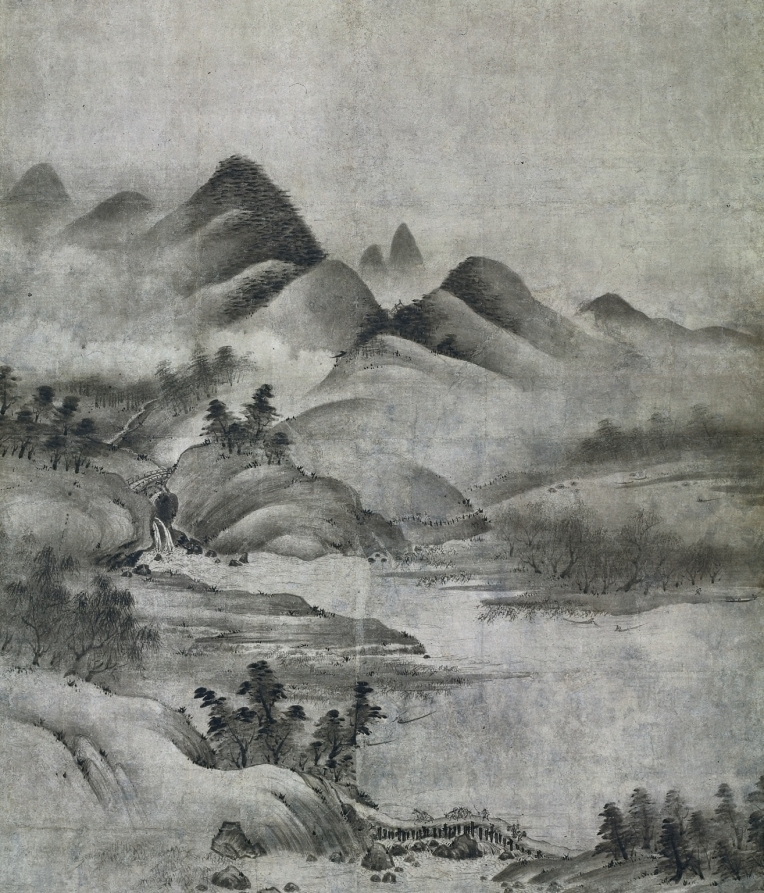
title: Landscape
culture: Japan, Muromachi period (1392–1573)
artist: Sōami (Japanese, d. 1525)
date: early 1500s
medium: hanging scroll; ink on paper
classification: Painting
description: Kyoto-based painter Sōami adapted the small-format Chinese album leaf and handscroll painting compositions belonging to the Ashikaga shogunate to the large-scale paintings he created for residences and Buddhist temples. As curator of the shogunal collection, Sōami would have carefully examined its Southern Song and Yuan dynasty Chinese paintings, gaining specialized knowledge of a variety of brush modes, including the soft style used for this painting. The scene is part of a continuous landscape once mounted in the folding screen format. Removed from the screen, this section of the painting was cut down, given new backing papers and a textile mounting with a hanging cord at the top and a roller with knobs at the bottom so that it could continue to be appreciated.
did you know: Another part of this composition survives in Kyushu, Japan.